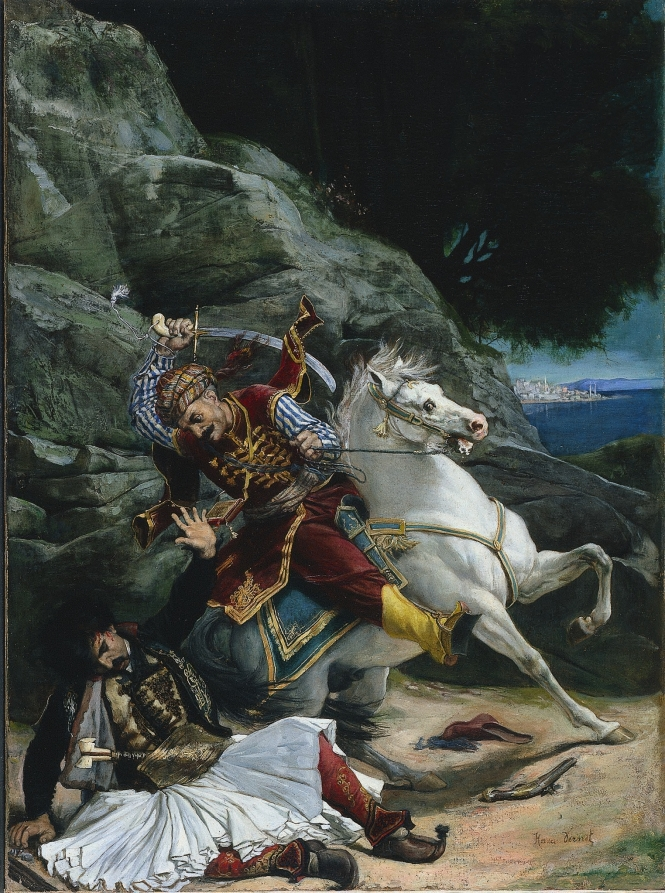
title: Combat of a Greek and a Turk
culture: France, 19th century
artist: imitator of Horace Vernet (French, 1789–1863)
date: after 1835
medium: oil on fabric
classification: Painting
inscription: Signed lower right: Horace Vernet